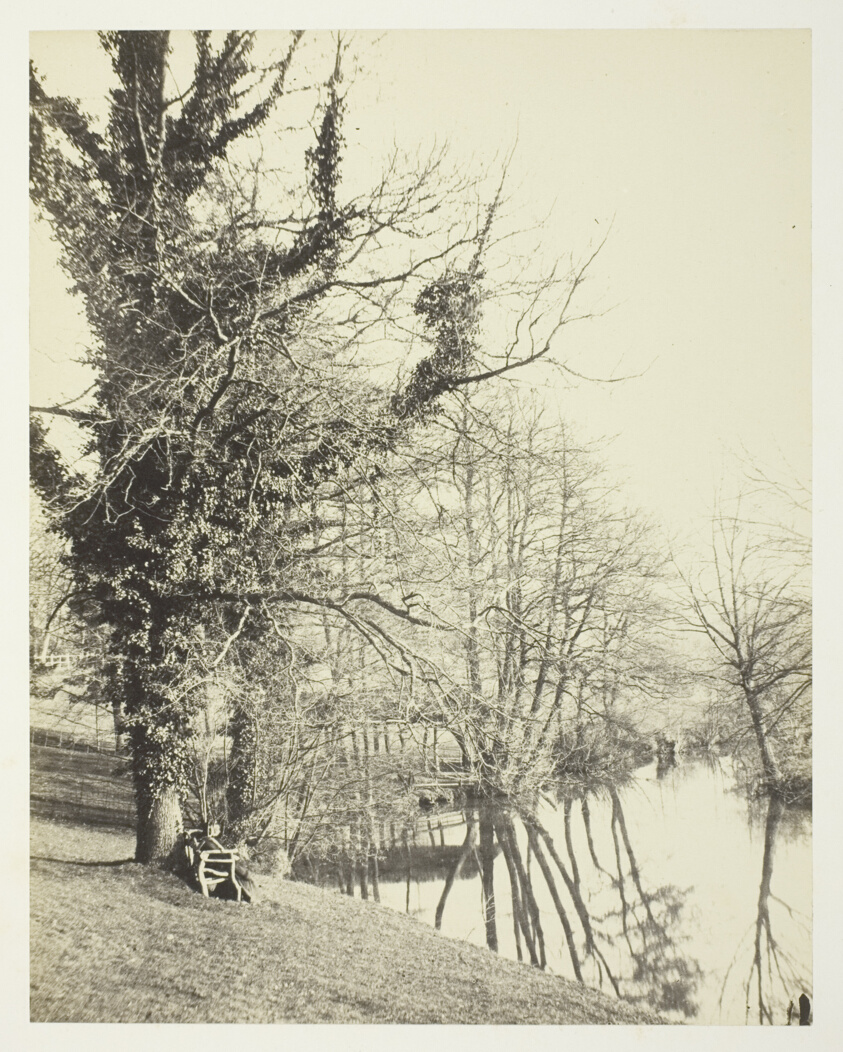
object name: Photograph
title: On the Mole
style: 19th century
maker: Alfred Rosling (English, 1802–1880s)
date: c. 1856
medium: Albumen print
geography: England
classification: albumen silver print; photographic process; photography; photograph